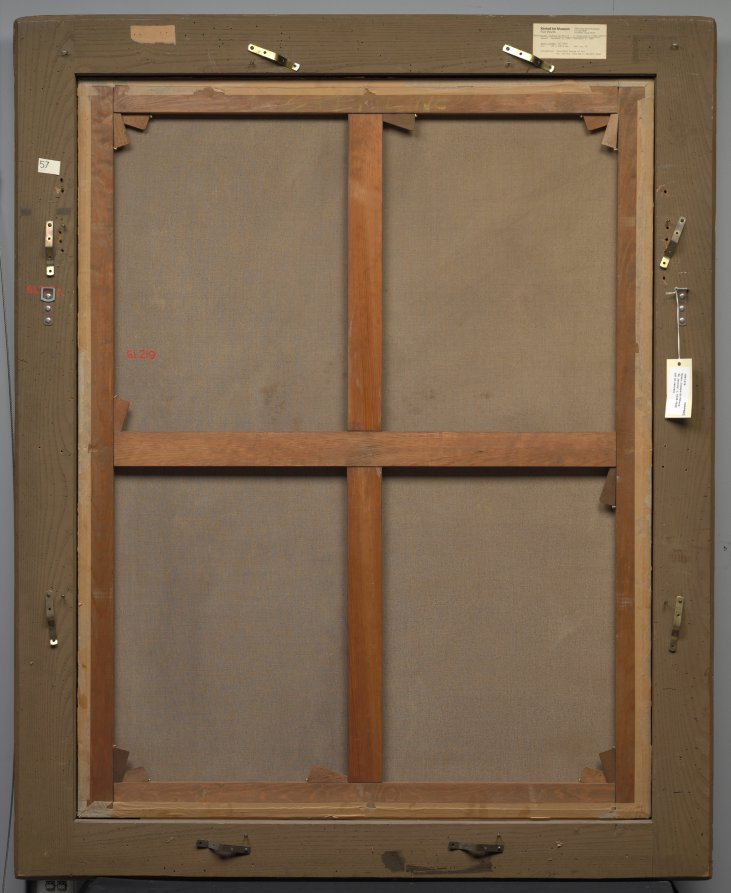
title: Saint Jerome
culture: Spain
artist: Jusepe de Ribera (Spanish, 1591–1652)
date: c. 1638–40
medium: oil on canvas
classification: Painting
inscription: Signed lower right: "Jusepe de Ribera espa[ñol]. F."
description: Saint Jerome (about ad 347–420) translated biblical texts into Latin. Although he sometimes appears as a scholar in his study, Ribera represents him here as a penitent who withdrew to the desert, beating his chest with a stone to emulate Christ’s suffering and contemplating a skull symbolizing human vanity. Working in Naples, Ribera enthusiastically adapted Caravaggio’s characteristic use of light and dark and naturalistic models.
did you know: Ribera signed the painting on the spine of the book in which Jerome will write.